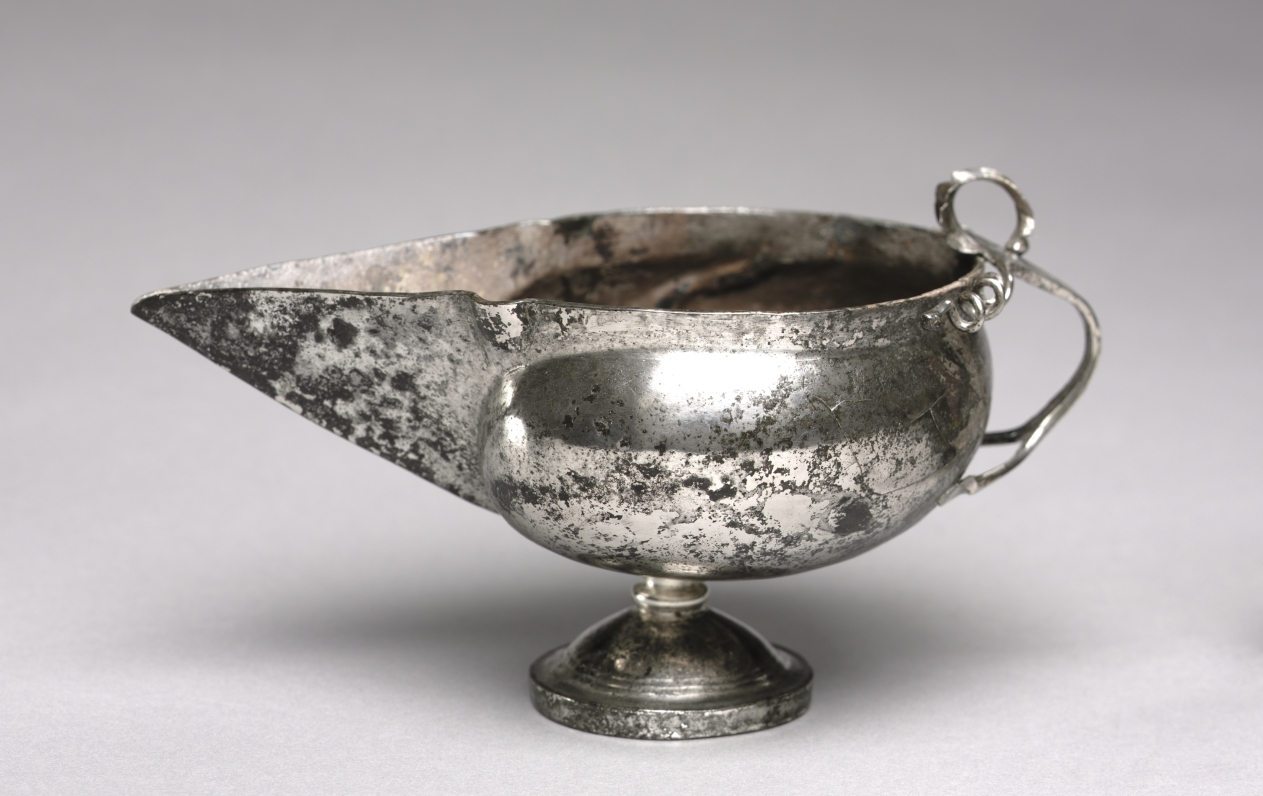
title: Spouted Pitcher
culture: Byzantium, Syria(?), Byzantine period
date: 300–600 CE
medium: silver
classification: Metalwork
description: A large quantity of tableware survives from the Roman Empire, including this piece from Antioch and the Eastern Mediterranean. Most of the recovered groups of silver seem to have been hoards concealed during times of trouble. A complete table service, called a ministerium in Latin and a synthesis in Greek, consisted of silver for eating and drinking: trays, platters, plates, dishes, spoons, pepper dispensers, goblets, pitchers, ladles, and bowls. The god of wine, Dionysos, was frequently depicted on drinking and eating vessels.